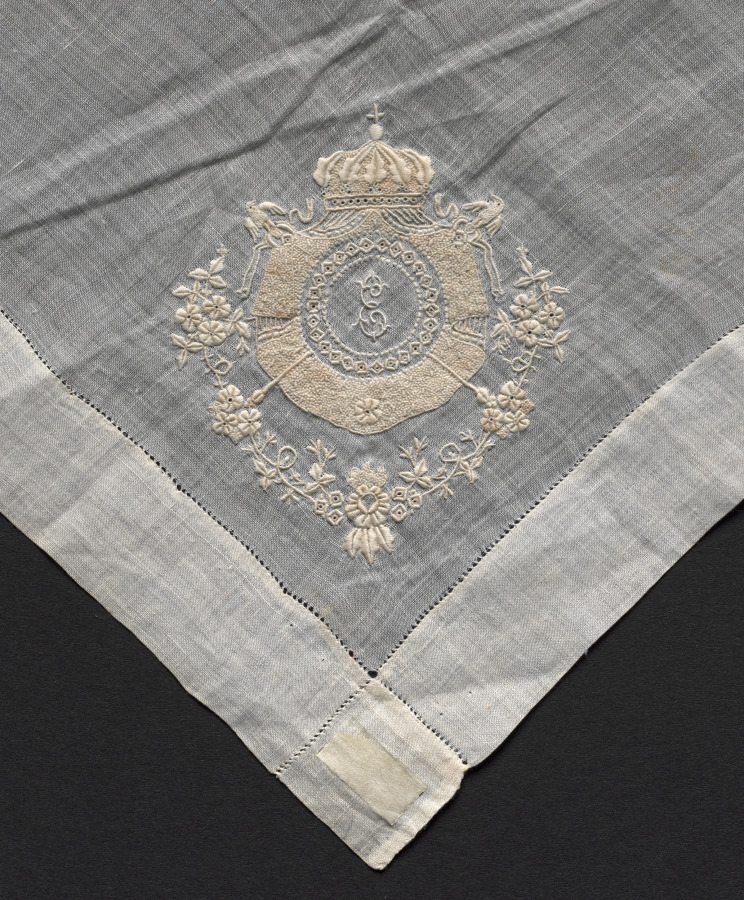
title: Handkerchief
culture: France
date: 1800s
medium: Plain weave linen, embroidered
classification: Embroidery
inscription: "E."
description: A letter E, for Empress Eugenie, and a crown are embroidered in white in one corner of this handkerchief.